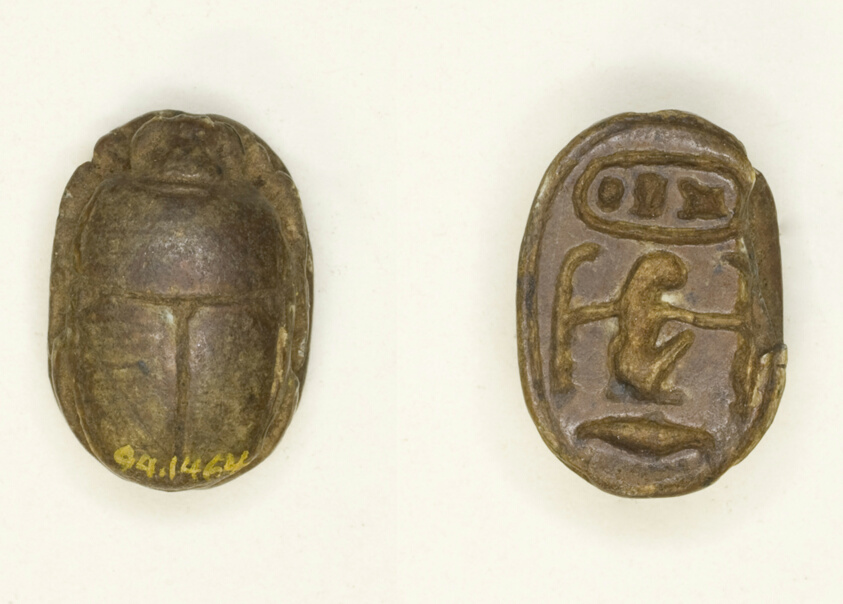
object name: Costume and Accessories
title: Scarab: Menkheperra (Thutmose III)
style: new kingdom, eighteenth dynasty, egyptian, ancient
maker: Egyptian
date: New Kingdom, Dynasty 18, Reign of Thutmose III (about 1479–1425 BCE)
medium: Stone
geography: Egypt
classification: scarab; ancient art; costume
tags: Hieroglyphs, cartouches, insects